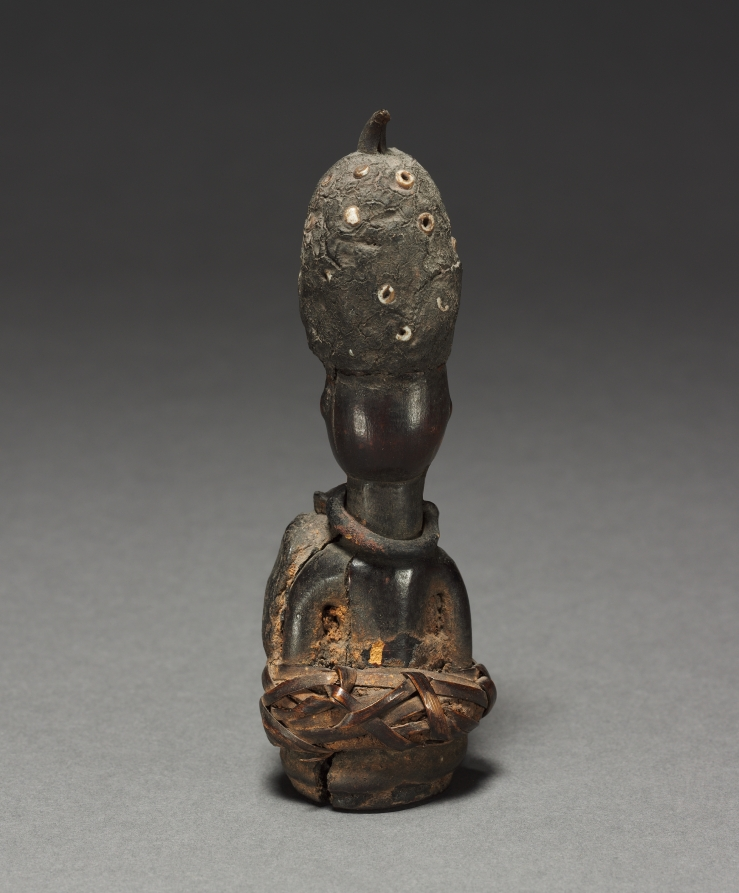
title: Power figure (nkisi)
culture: Central Africa, Republic of the Congo, Kongo people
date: late 1800s-early 1900s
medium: Wood, organic materials (including resin), iron, reed, tooth, seashell or glass beads, and possibly plastic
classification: Sculpture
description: One of seven anthropomorphic figurines, these minkisi contained medicines in which an ancestral spirit was believed to reside. Minkisi were objects of communal use; if conflict arose between two citizens, the Nkisi figure, along with the nganga (ritual leader) helped resolve the dispute. This small figure belonged to “the sorcerer of Loango,” chief of all sorcerers of that region (a province and port in West Central Africa).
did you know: This small figure belonged to “the sorcerer of Loango,” chief of all sorcerers of that region (a province and port in West Central Africa).